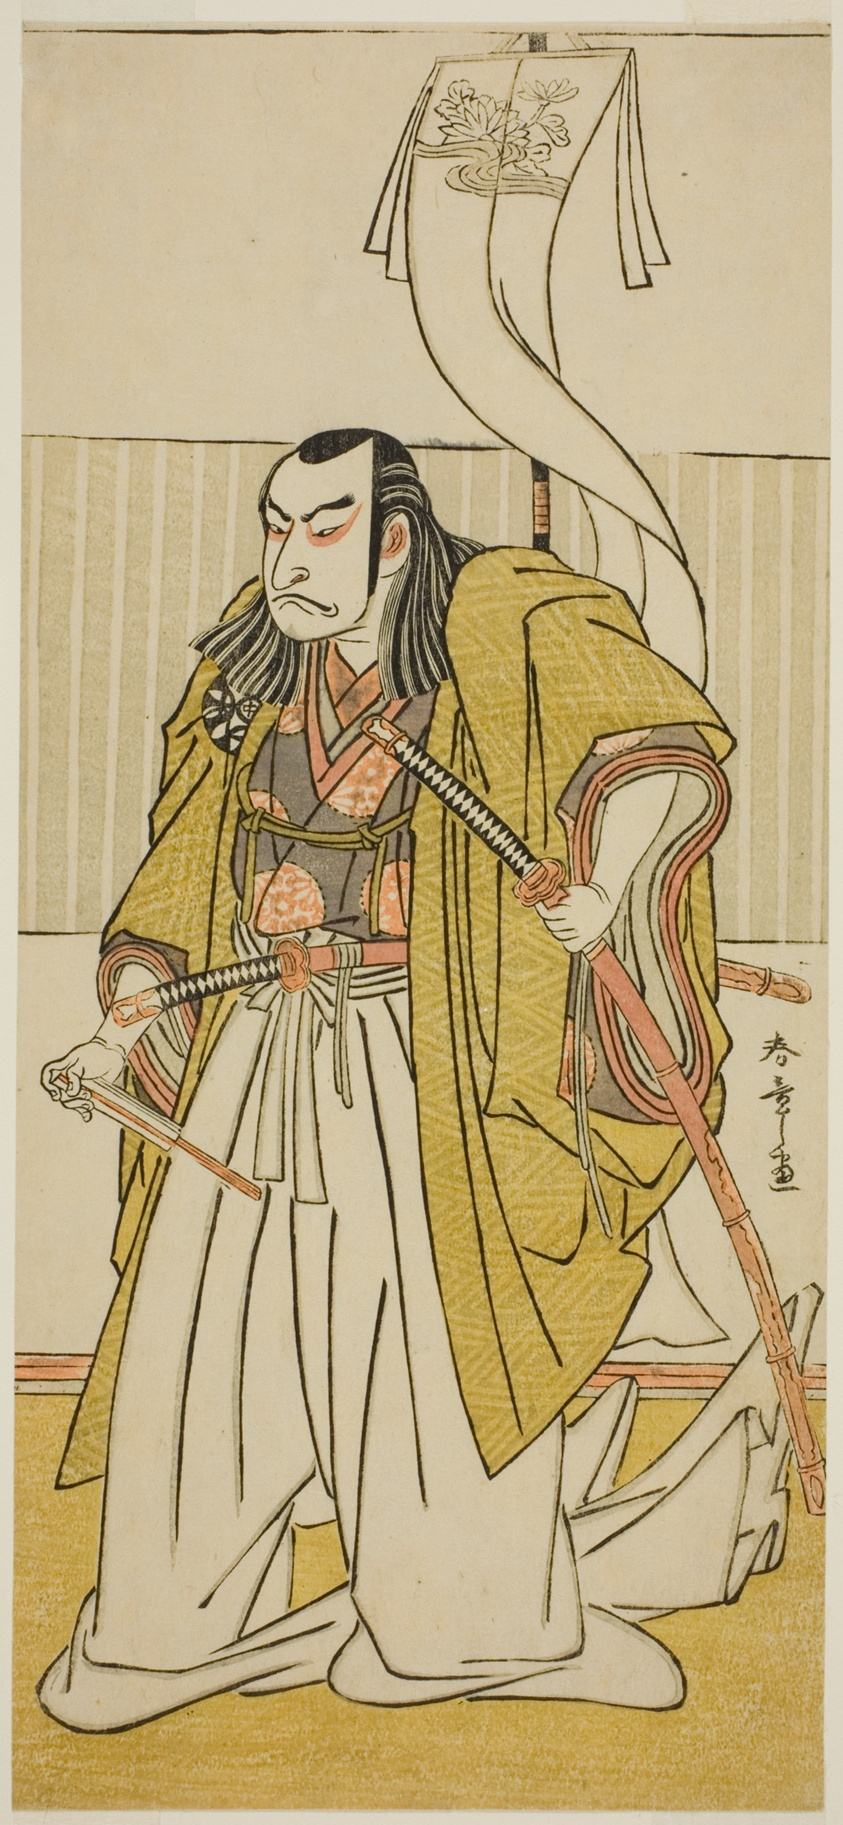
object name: Print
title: The Actor Nakamura Nakazo I as Kusunoki Masayuki Disguised as Uji no Joetsu, in the Play Go Taiheiki Shirishi-banashi, Performed at the Morita Theater in the Fourth Month, 1780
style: Japanese (culture or style)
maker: Katsukawa Shunsho 勝川 春章; Japanese, 1726-1792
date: c. 1780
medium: Color woodblock print; hosoban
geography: Japan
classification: woodblock print; print; asian art